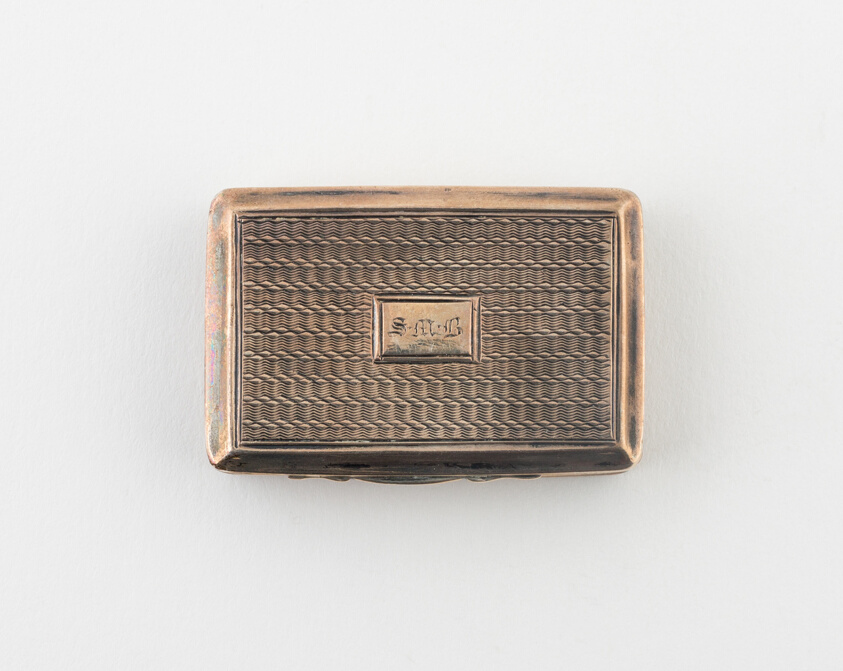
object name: Metalwork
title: Vinaigrette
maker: Edward Smith; Birmingham, England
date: c. 1825/26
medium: Silver and silver gilt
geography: Birmingham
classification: container for personal use; vinaigrette (container for health care); european decorative arts; metalwork; silver; decorative object/ornament